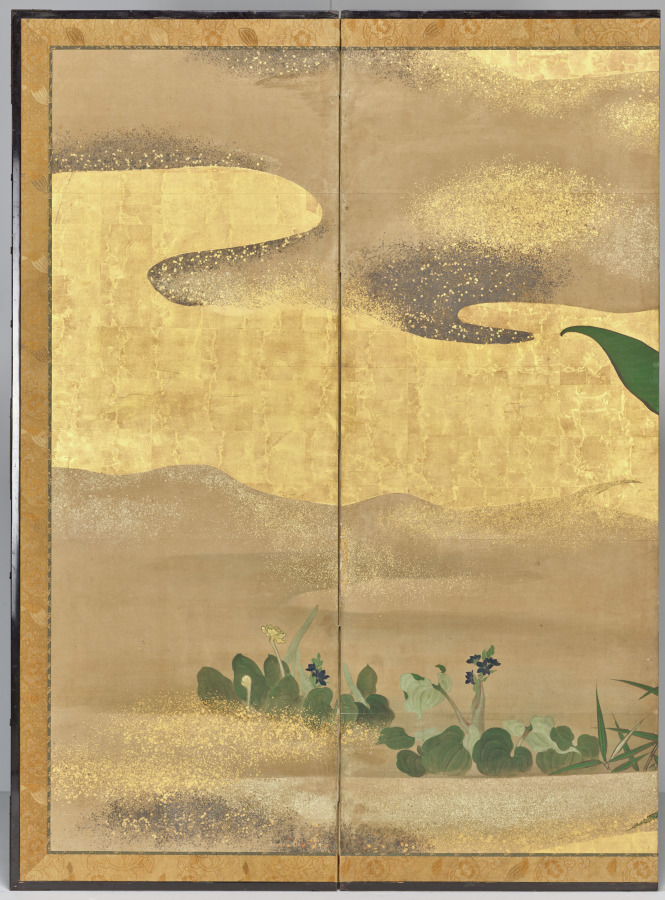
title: Flowers and Trees of the Four Seasons (right screen)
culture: Japan, Edo period (1615–1868)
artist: Watanabe Shikō (Japanese, 1683–1755)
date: early to mid-1700s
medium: Six-panel folding screen; ink, color, gold, silver, and gilding on paper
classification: Painting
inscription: 始興之印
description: The painter Watanabe Shikō had a special interest in scientific realism, based on interactions with his patron Konoe Iehiro. Shikō combined his attention to accurate depiction of plants with strong ink outlines and decorative elements like gold and silver, arriving at an innovative style that influenced many of his peers in the city of Kyoto.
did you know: One plant in these screens, tumeric, or ukon in Japanese, is found in Okinawa.